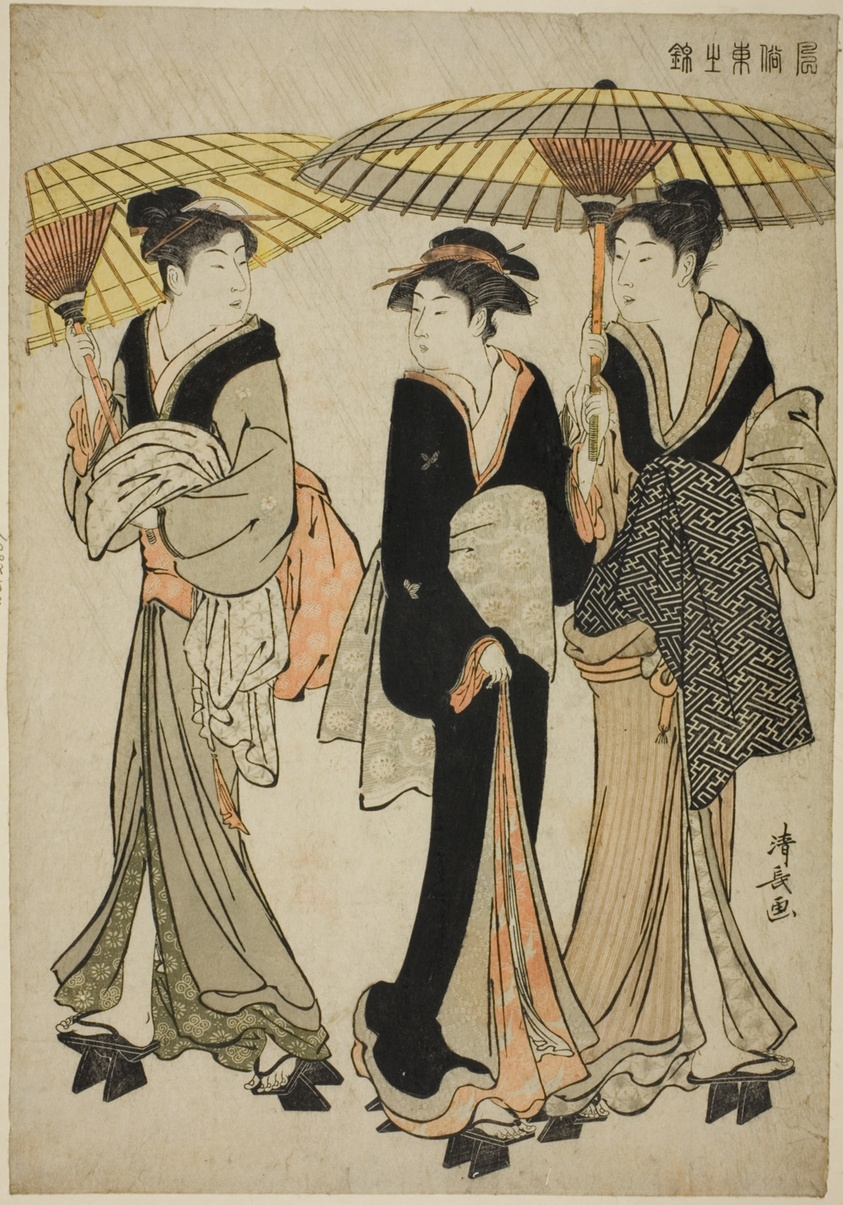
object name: Print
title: Under Umbrellas in a Shower, from the series "A Brocade of Eastern Manners (Fuzoku Azuma no nishiki)"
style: Japanese (culture or style)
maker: Torii Kiyonaga (Japanese, 1752-1815)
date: c. 1783/84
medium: Color woodblock print; oban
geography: Japan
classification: woodblock print; print; asian art